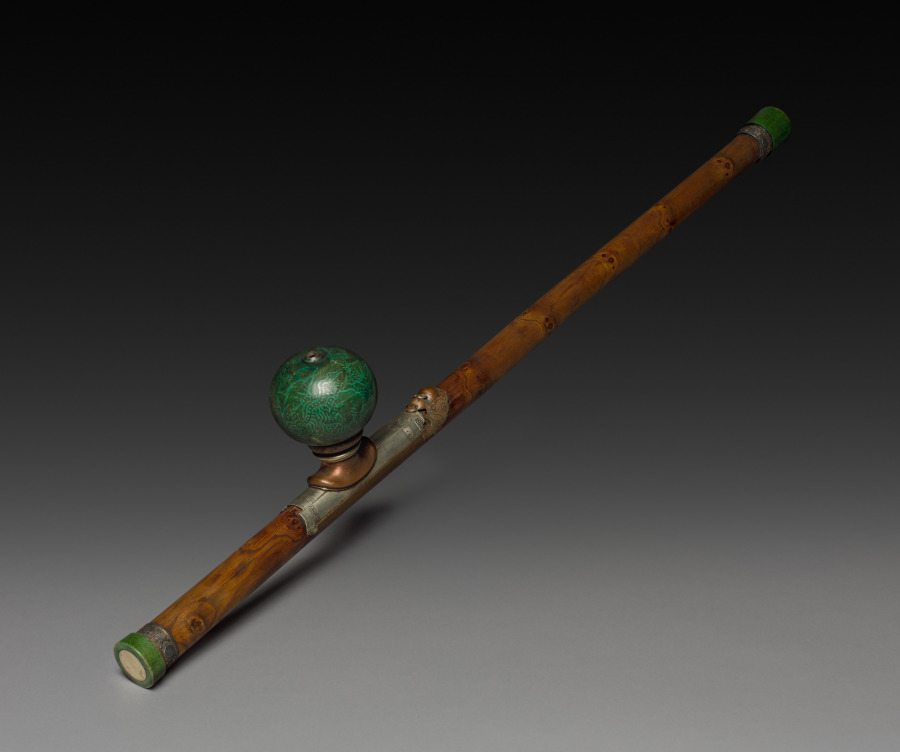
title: Opium Pipe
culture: China, Qing dynasty (1644-1911)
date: 1800s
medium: wood stem decorated with bronze and silver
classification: Miscellaneous